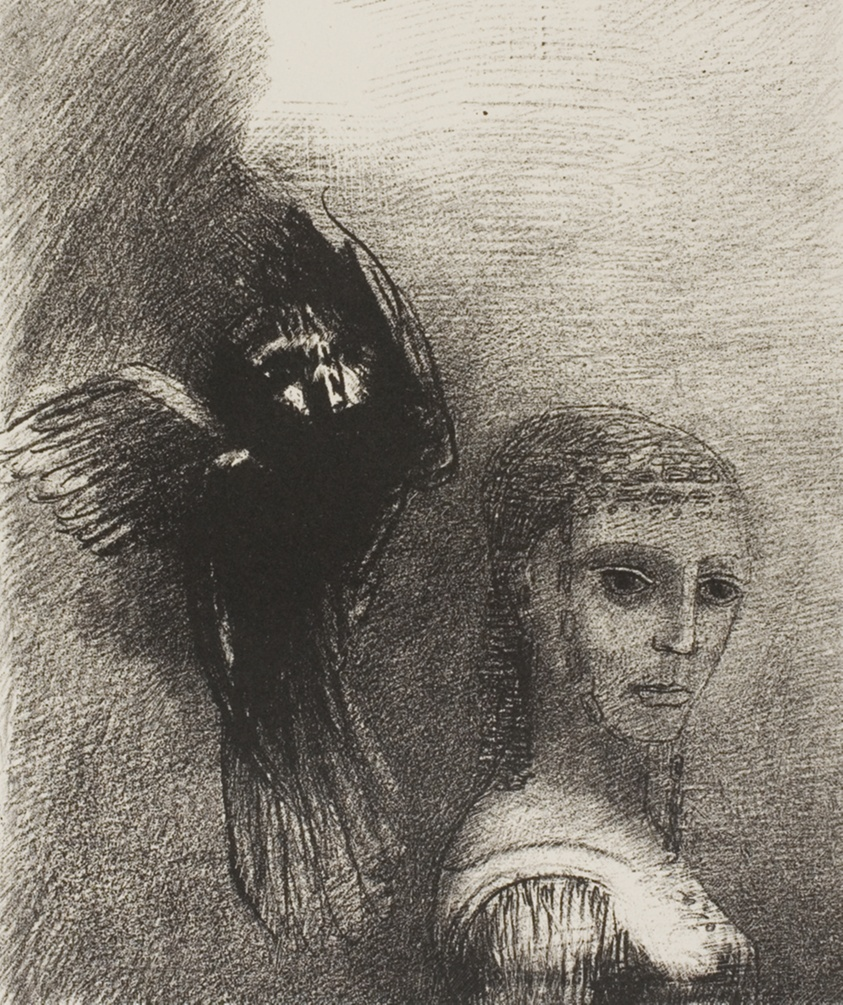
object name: Print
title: And a Large Bird, Descending From the Sky, Hurls Itself Against the Topmost Point of Her Hair, plate 3 of 10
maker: Odilon Redon (French, 1840-1916)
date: 1888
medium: Lithograph in black on ivory wove paper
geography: France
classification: lithograph; print; prints and drawing; paper